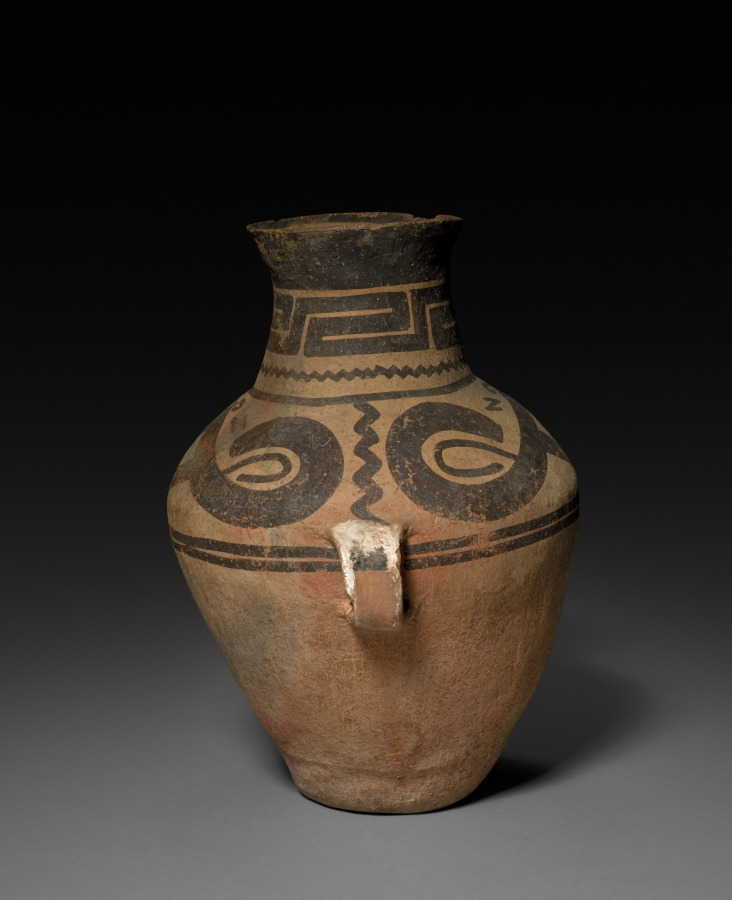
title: Urn with Lug Handles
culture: China, Gansu province, Xindian Culture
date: c. 1300–1000 BCE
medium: earthenware with slip coating and painted decoration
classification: Ceramic